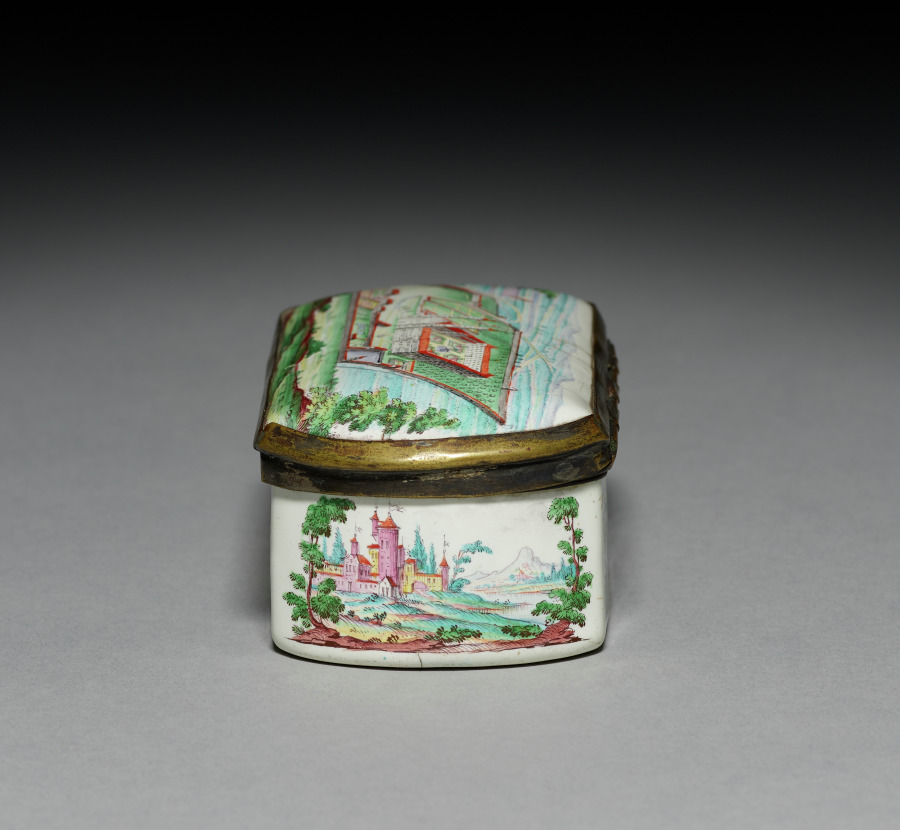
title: Snuff Box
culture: Austria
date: mid-1700s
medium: enamel on copper with metal mounts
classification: Miscellaneous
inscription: on interior of lid in a rococo cartouche: "S Hieronimus."